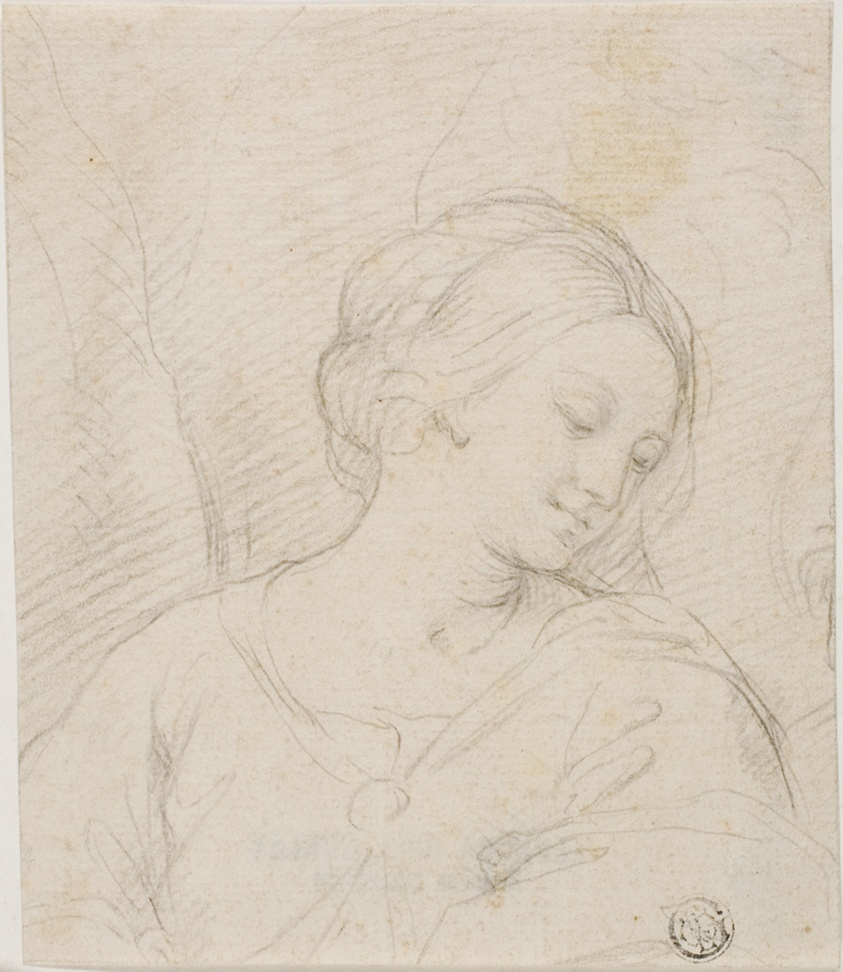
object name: Drawing and Watercolor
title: Half-Length View of Madonna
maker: Follower of Carlo Maratti (Italian, 1625-1713); or Style of Elisabetta Sirani (Italian, 1638-1665)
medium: Black chalk on ivory laid paper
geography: Italy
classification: graphite; drawings (visual works); prints and drawing